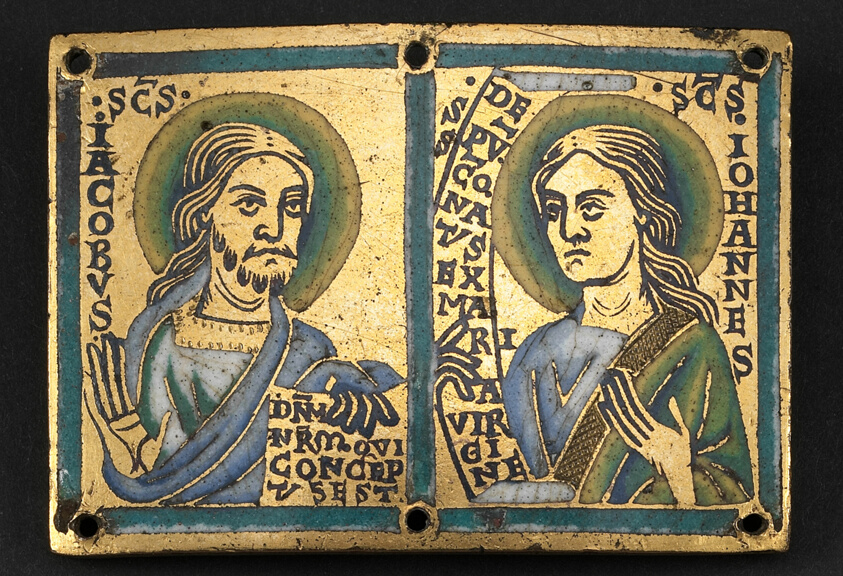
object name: Decorative Arts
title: Plaque with Saints James and John the Evangelist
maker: Mosan (Meuse River Valley)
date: 1160/80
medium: Gilt copper, champlevé enamel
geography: Meuse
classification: enamel; european decorative arts; decorative arts